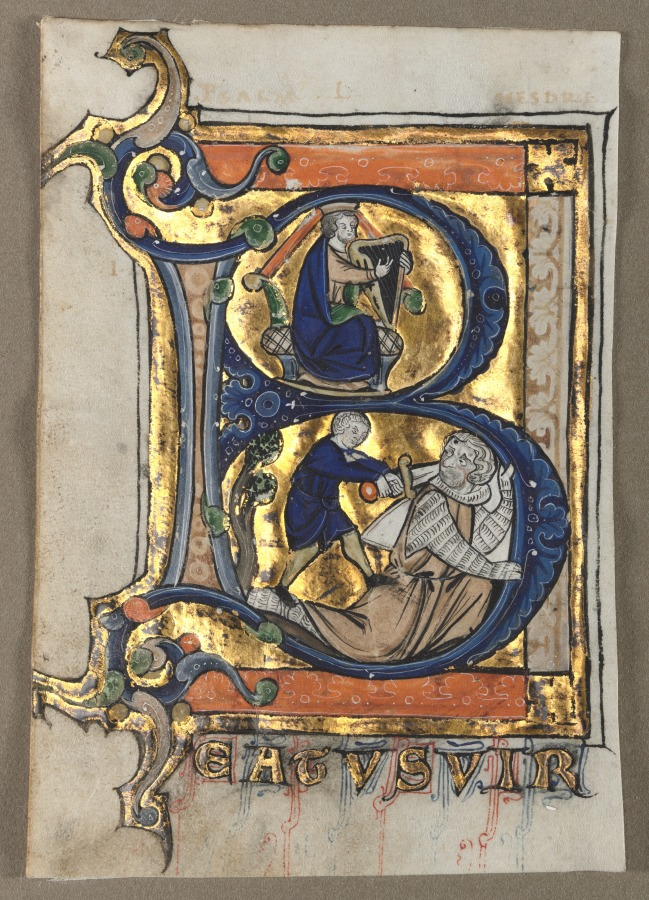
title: Leaves Excised from a Psalter (seven)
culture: Flanders, Liège(?), 13th century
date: c. 1260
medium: tempera and gold on vellum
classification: Manuscript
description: Traditional locations within the texts of manuscript psalters were marked by decorated initials or full-page miniatures. These miniatures designated the major divisions of the psalms as used in the daily office. The extraordinary quality of these miniatures suggests they once decorated a deluxe psalter made for a wealthy or aristocratic patron.